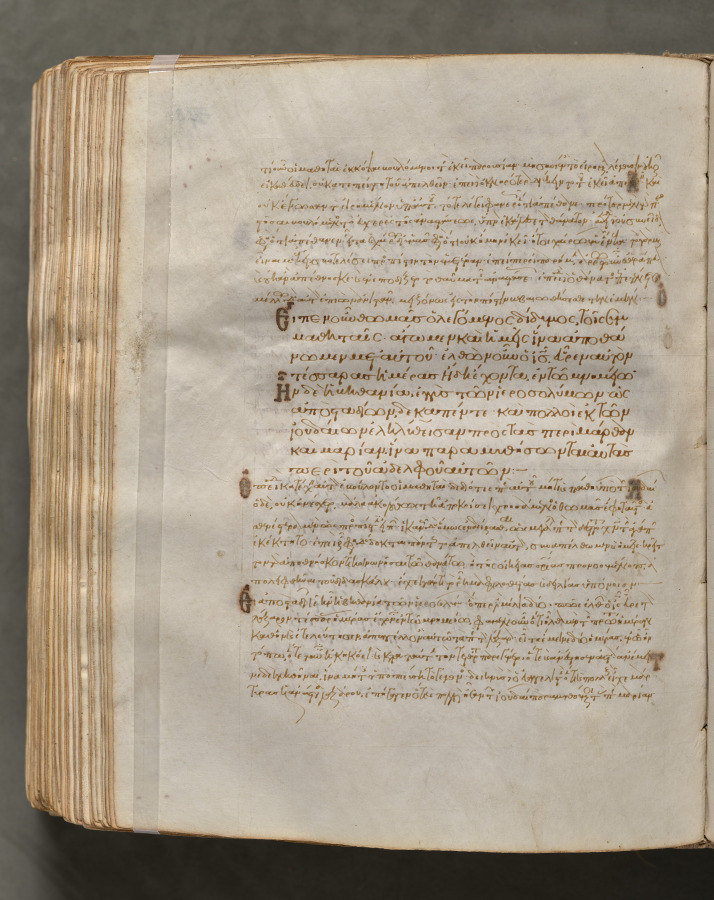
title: Text, folio 377 (verso), from a Gospel Book with Commentaries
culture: Byzantium, Constantinople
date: c. 1000–1100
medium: ink, tempera, and gold on vellum; leather binding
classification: Bound Volume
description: Each of the four gospels in this book opens on a page with brilliantly illuminated borders depicting the author of the text as well as birds—principally peacocks, symbols of the immortality of the soul—and fountains, representing the fountain of life and the salvation of the soul. This volume consists of 428 leaves with texts in Greek. Its level of sophistication suggests that it was probably written and decorated in a monastery in Constantinople.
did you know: Gospel books were carried in procession through Byzantine churches.